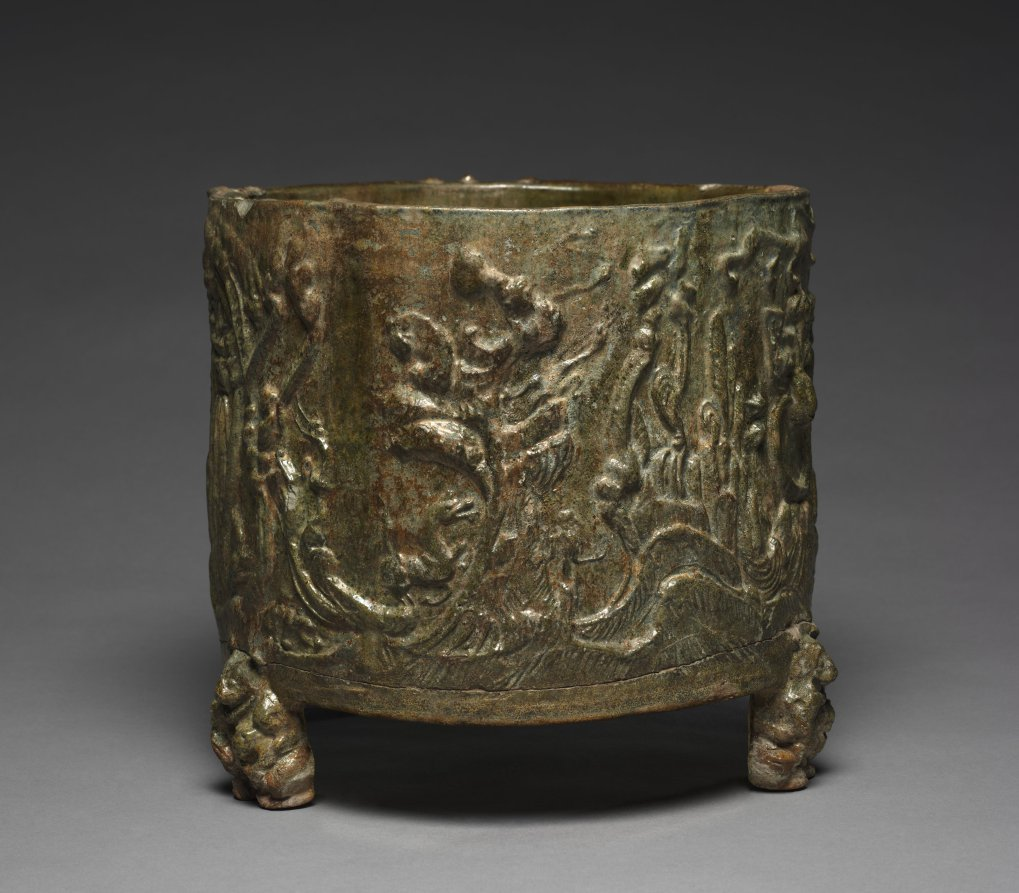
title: Cylindrical Jar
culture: China, Han dynasty (202 BCE–220 CE)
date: 202 BCE–220 CE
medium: lead glazed earthenware with molded relief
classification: Ceramic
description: Vessels like this often are call "hill jars" since many survive with conical covers shaped in rising peaks. "Squatting bear" feet and false animal-mask ring handles are common to the group. This cylinder has been molded in two relief bands depicting hills and three populated with a medley of real and imaginary creatures. Wispy human-like figures are associated with a popular cult of Taoism prevalent in China during the Han Dynasty. The scene may represent a paradise of immortality idealized by that cult and appropriate to this vessel's offering as a burial gift. When excavated from Han tombs, similar jars have been found to hold animal bones or powder; they may have served as food or cosmetic containers. Regardless of symbolism or function, this piece provides evidence for the appearance of early landscape lost in more fragile media.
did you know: The three feet are in the form of seated bears holding cubs.